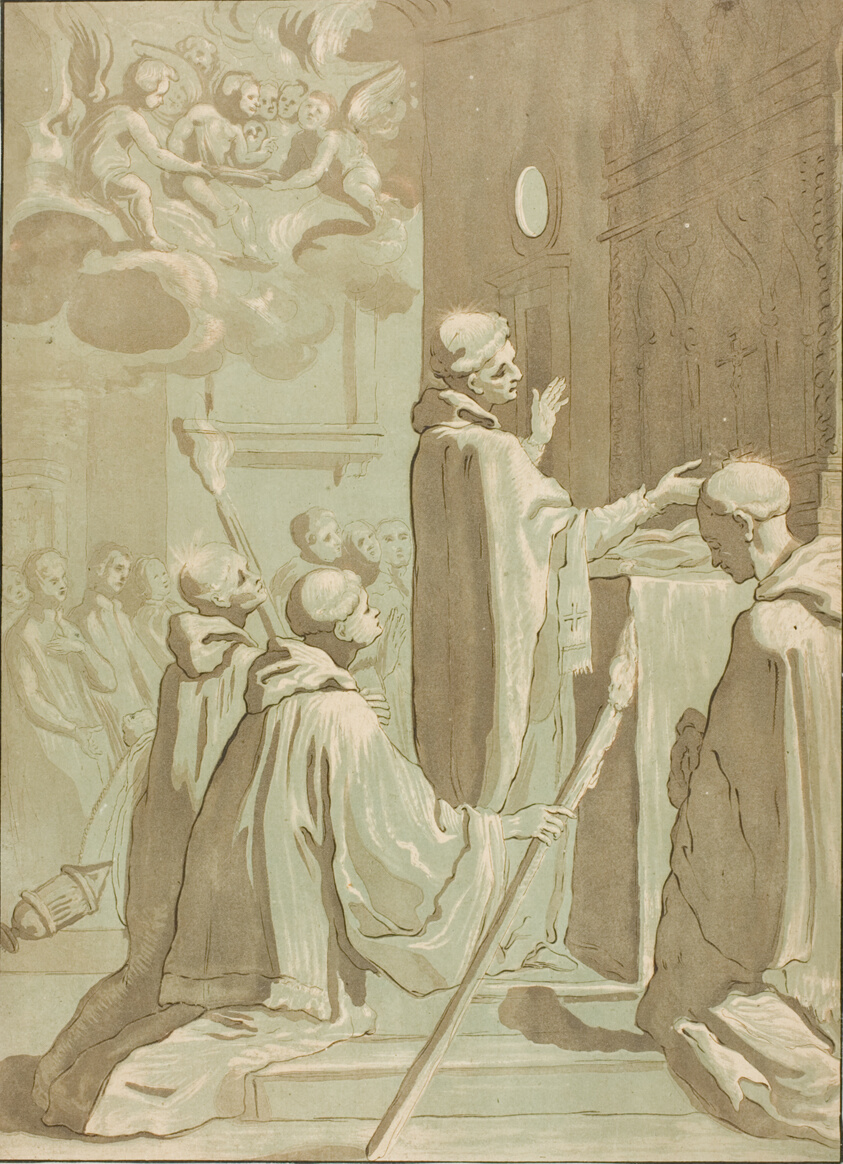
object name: Print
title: The Celebration of High Mass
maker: Maria Katharina Prestel (German, 1747-1794); after Jacopo Vignali (Italian, 1592-1664)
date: c. 1776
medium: Etching and acquatint in brown and green on cream wove paper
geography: Germany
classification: etching; print; prints and drawing